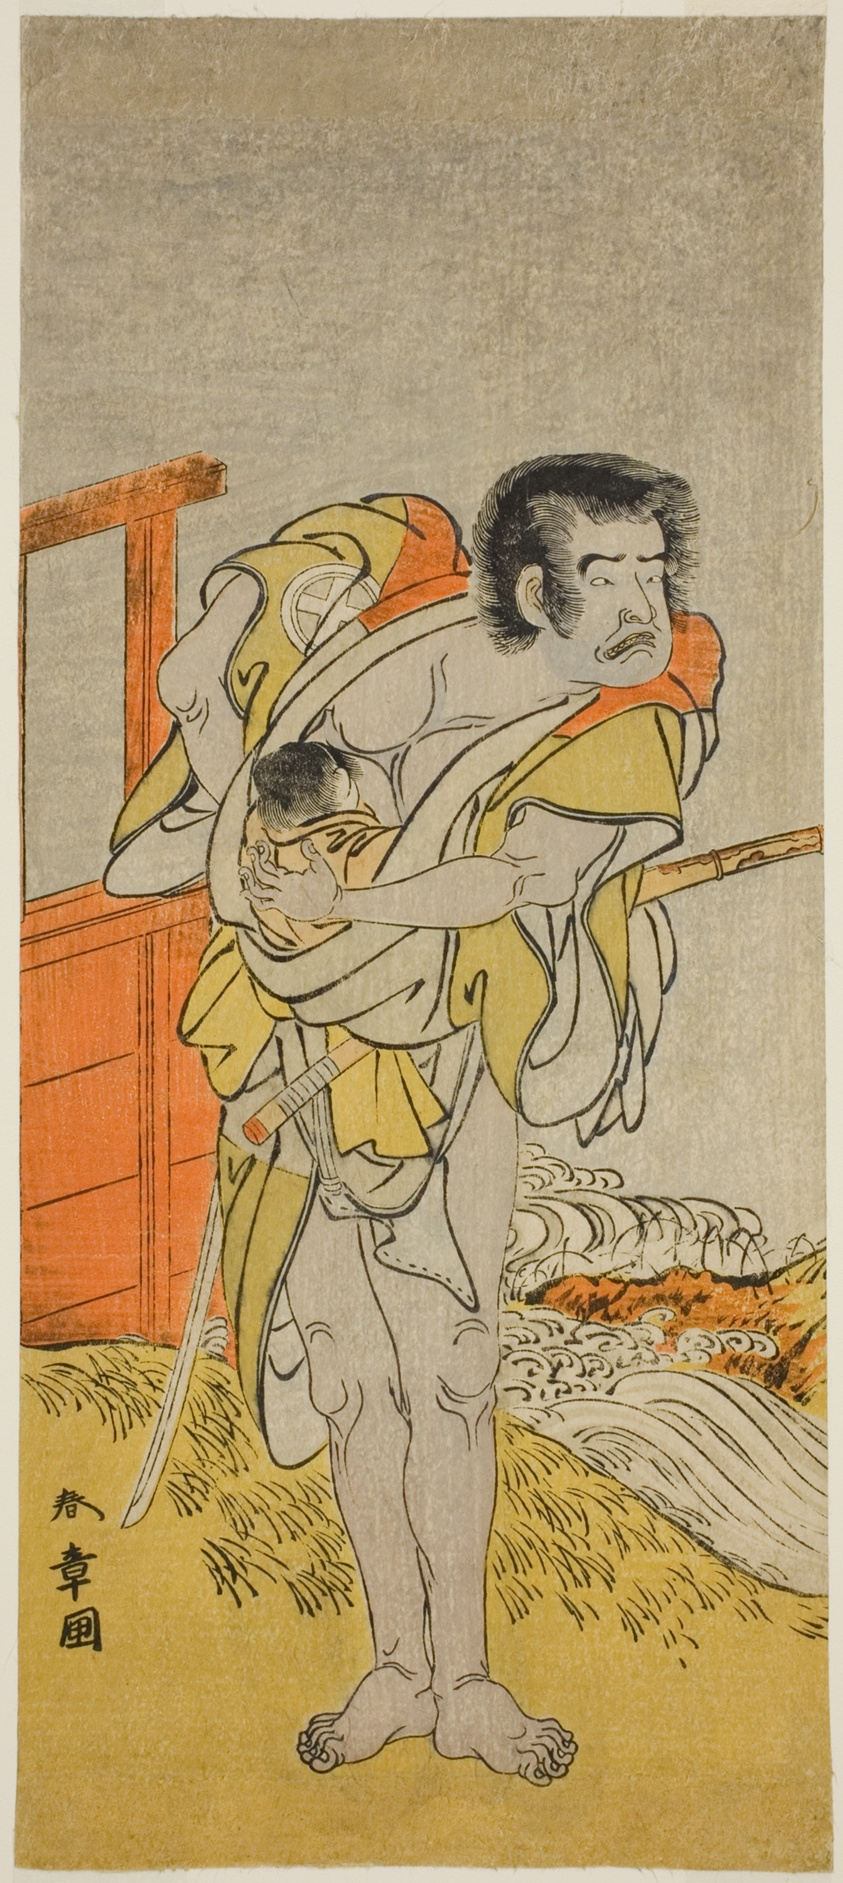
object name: Print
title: The Actor Otani Tomoemon I as Kasahari Hokkyo in the Play Kazoe Uta Ta Ue Soga, Performed at the Nakamura Theater in the First Month, 1776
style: Japanese (culture or style)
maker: Katsukawa Shunsho 勝川 春章; Japanese, 1726-1792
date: c. 1776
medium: Color woodblock print; hosoban; left sheet of diptych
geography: Japan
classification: woodblock print; print; asian art